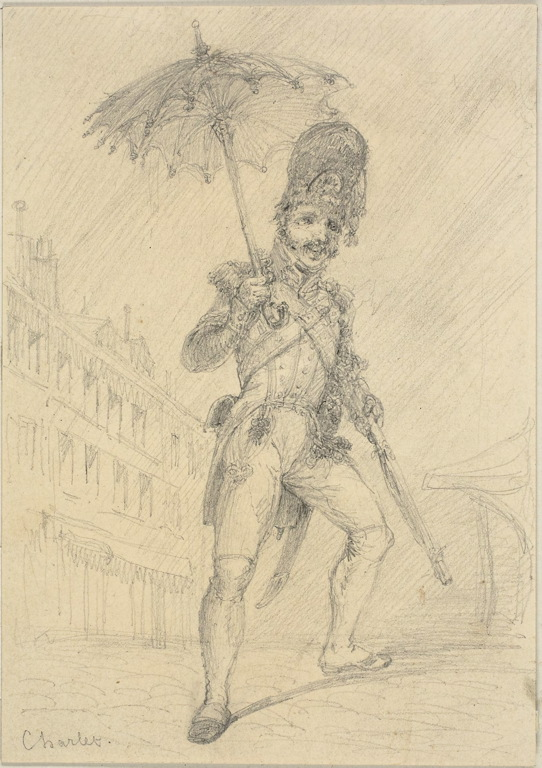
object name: Drawing and Watercolor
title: Soldier Holding a Parasol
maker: Nicolas Toussaint Charlet (French, 1792-1845)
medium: Graphite on cream wove card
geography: France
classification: graphite; drawings (visual works); prints and drawing